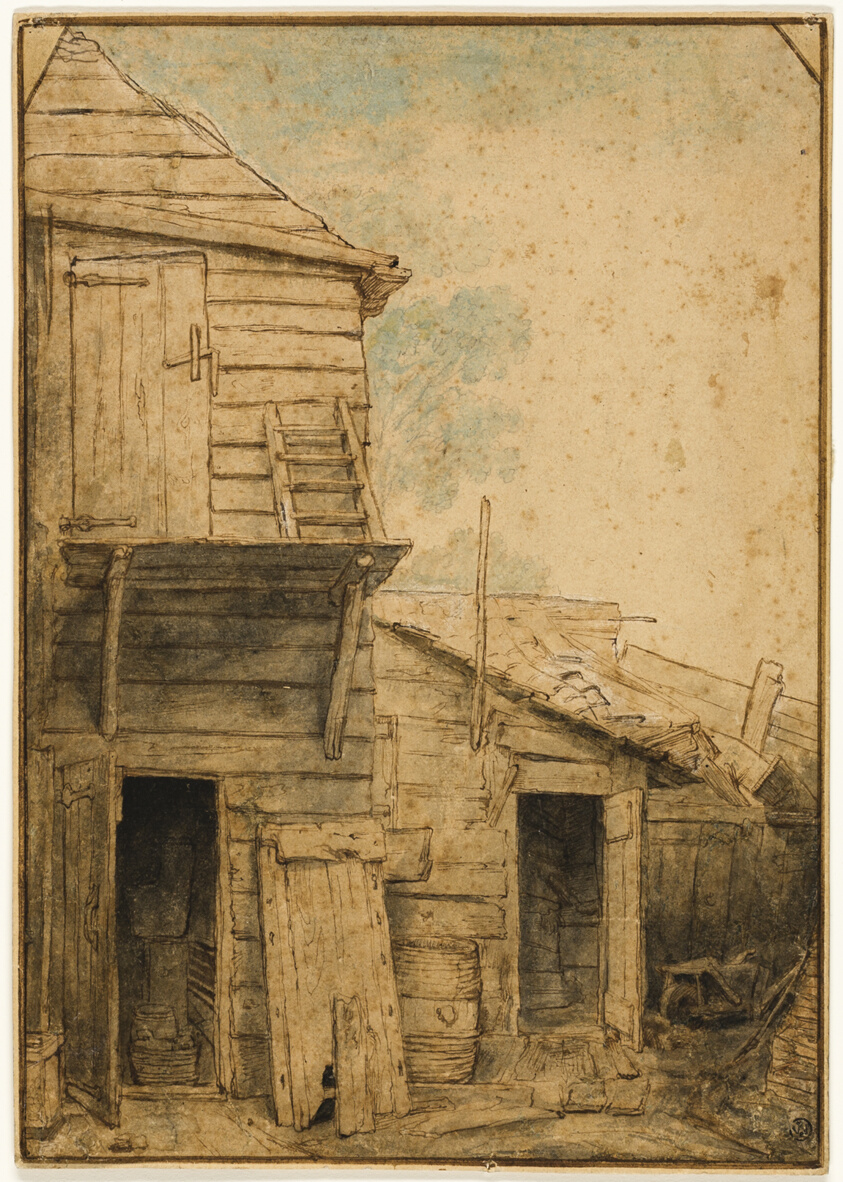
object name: Drawing and Watercolor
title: Farmyard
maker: Attributed to Adriaen van Ostade; Dutch, 1610-1685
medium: Pen and brown ink, with brush and brown, black, and blue wash, over graphite, on tan laid paper, laid down on cream laid card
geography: Holland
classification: pen and ink drawings; drawings (visual works); prints and drawing